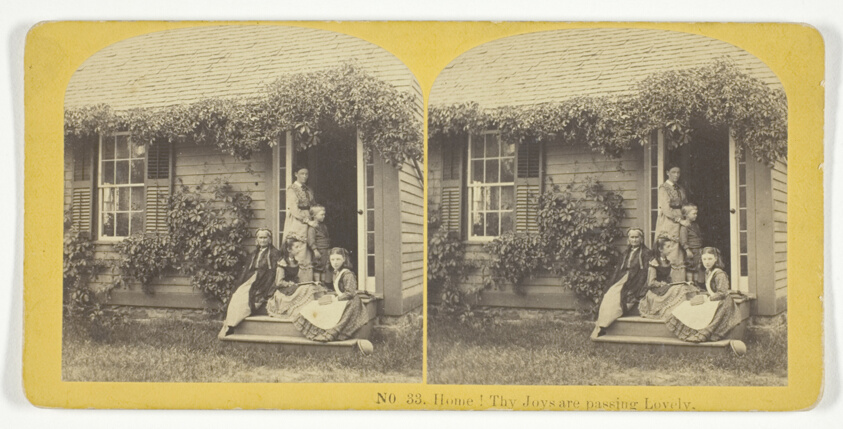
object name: Photograph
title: Home! Thy Joys are passing Lovely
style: 19th century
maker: Kilburn Brothers (American, active 1855-1875)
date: 1855/75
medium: Albumen print, stereo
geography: New Hampshire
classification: photography; photograph; albumen silver print; stereograph (albumen)